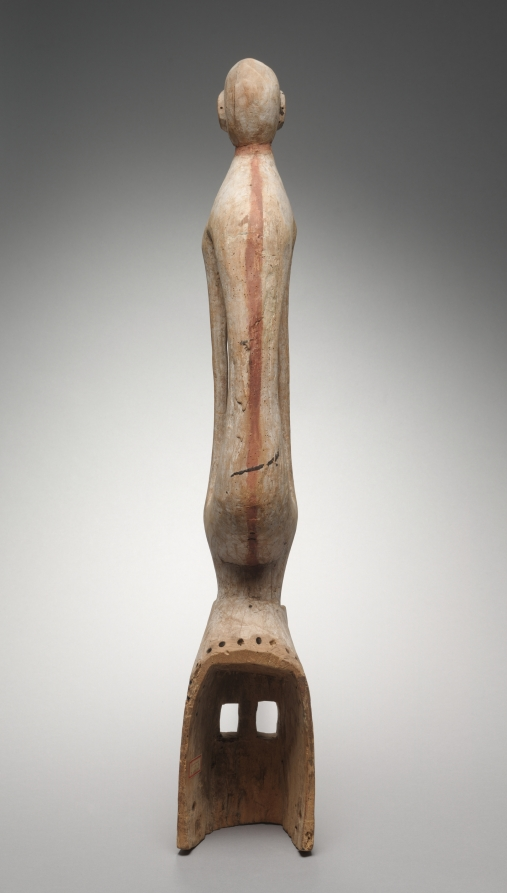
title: Mask (Omono or Tana Wurum Bogoro)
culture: Africa, West Africa, Mali, Dogon-style blacksmith-carver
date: early 1900s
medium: Wood and paint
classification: Mask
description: Dogon masks can be interpreted on two fundamentally different levels: “front speech” (giri so) reflects an early stage of knowledge and consists of a tale that is intended to arouse curiosity; and “speech of the world” (aduno so) refers to Dogon cosmogony, reserved for highly instructed men and women. Masked dances have recently been organized in Dogon regions for tourists and dignitaries. The character of omono is a rare one among the 80 or so that appear in Dogon masquerades.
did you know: The long-armed figure at the top of this mask is omono, a white-bellied monkey.